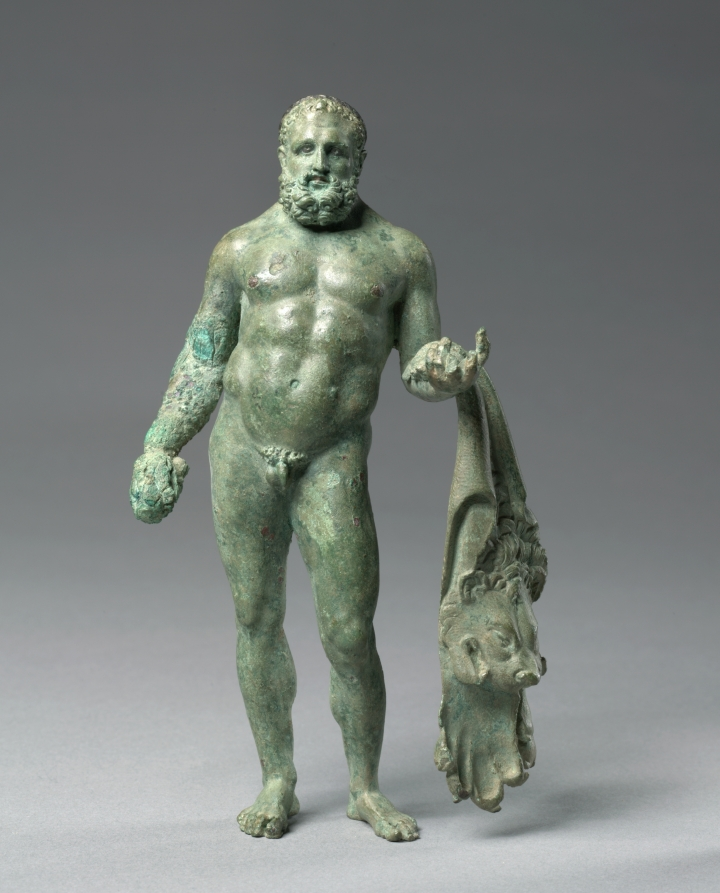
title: Hercules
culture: Italy, Rome, Early Imperial period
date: c. 30 BCE–20 CE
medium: bronze with silver and copper inlays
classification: Sculpture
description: This bronze statuette is a nude figure of the hero Hercules. He stands in a contrapposto pose, with the majority of his weight on one leg. Over his left arm, Hercules holds the skin of the Nemean Lion, having slayed the beast as part of his Twelve Labors and now carrying the pelt as a trophy. Although now mostly lost, Hercules once held his signature wooden club in his right hand. Roman artists often portrayed Hercules as middle-aged, as though greater maturity would increase his power and virility.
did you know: Hercules is the Roman name for the classical hero known in Greek as Herakles.